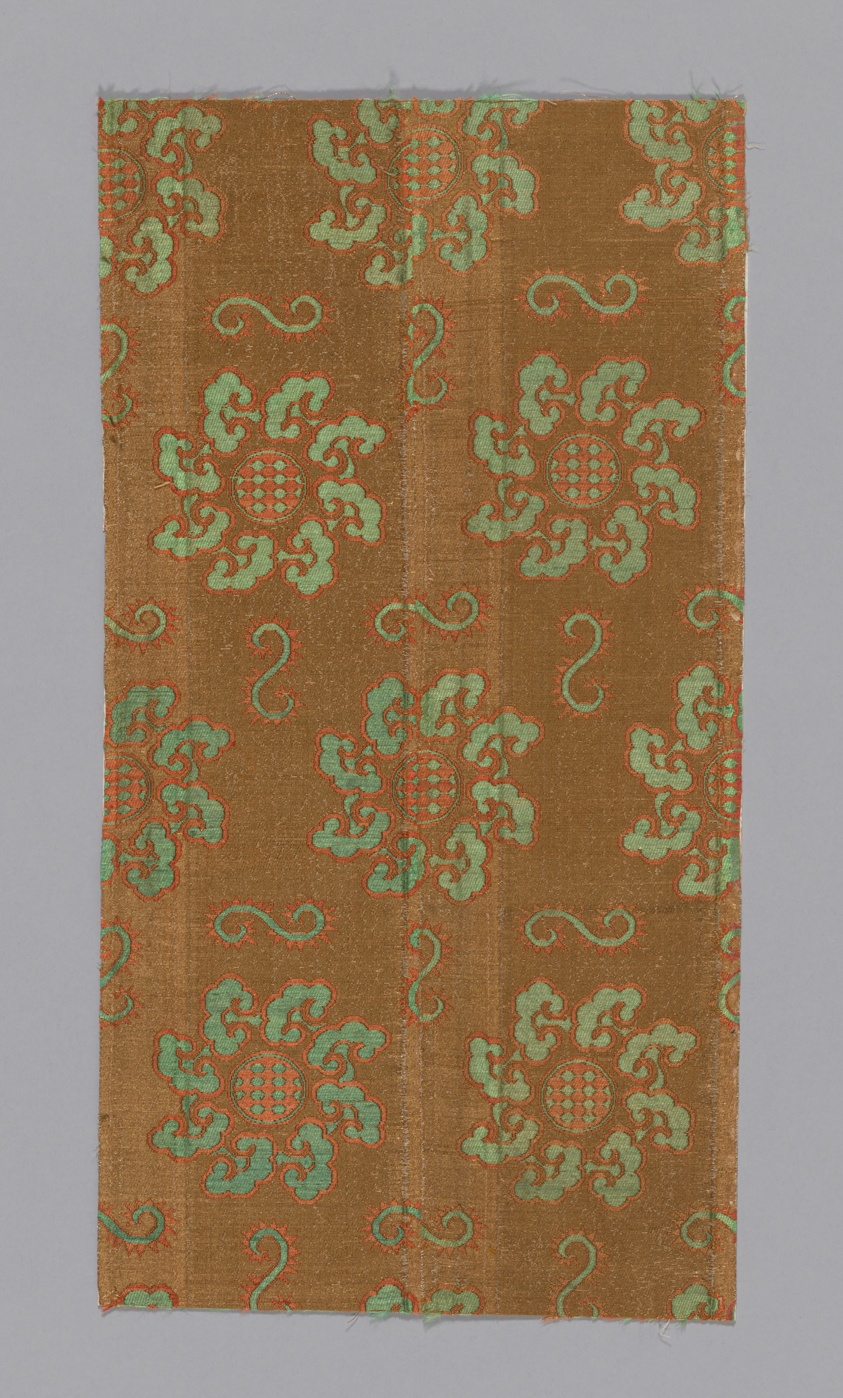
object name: Textile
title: Fragment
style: meiji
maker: Japan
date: Meiji period (1868–1912), 1875/1900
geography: Japan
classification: textile; weaving